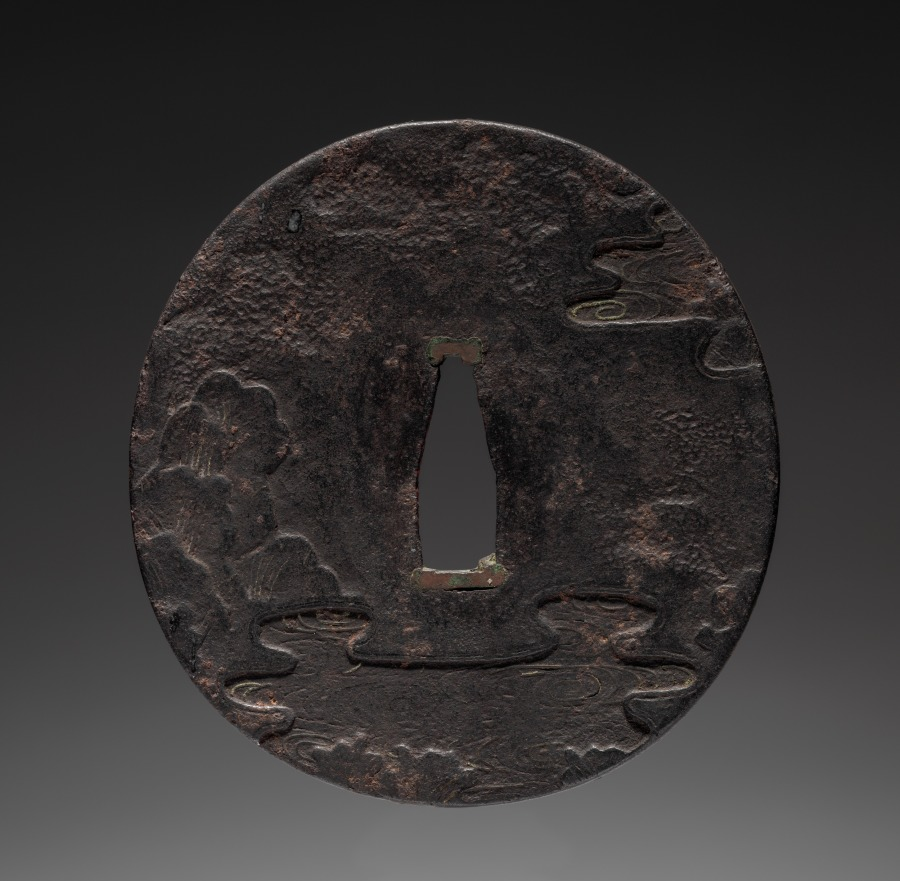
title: Sword Guard (Tsuba) with Landscape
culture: Japan, possibly Edo period (1615-1868)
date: c. 1615–1868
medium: iron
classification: Arms and Armor